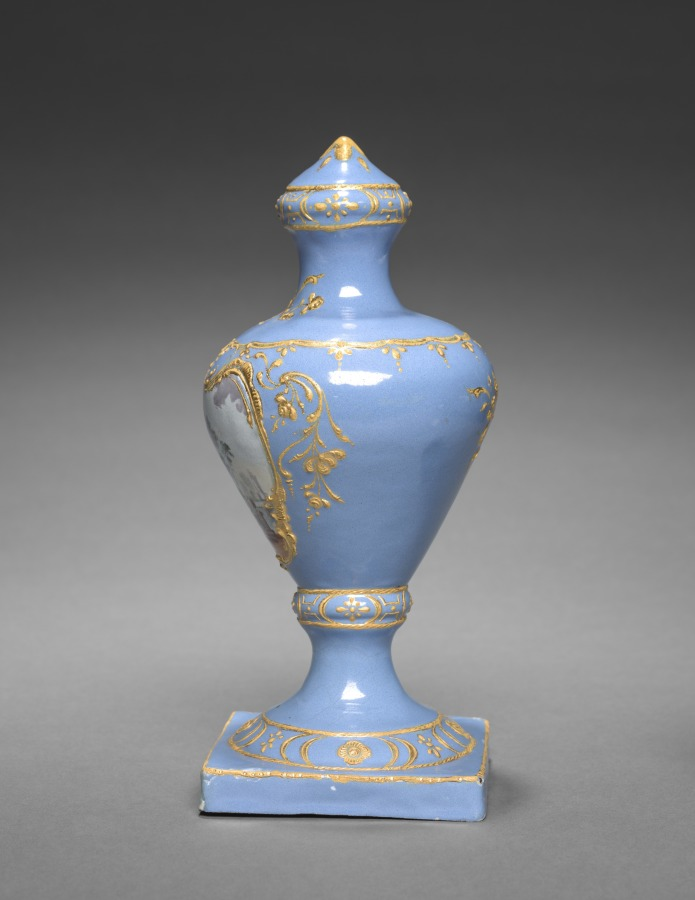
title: Urn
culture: England, South Staffordshire, 18th century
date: c. 1770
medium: enamel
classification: Enamel